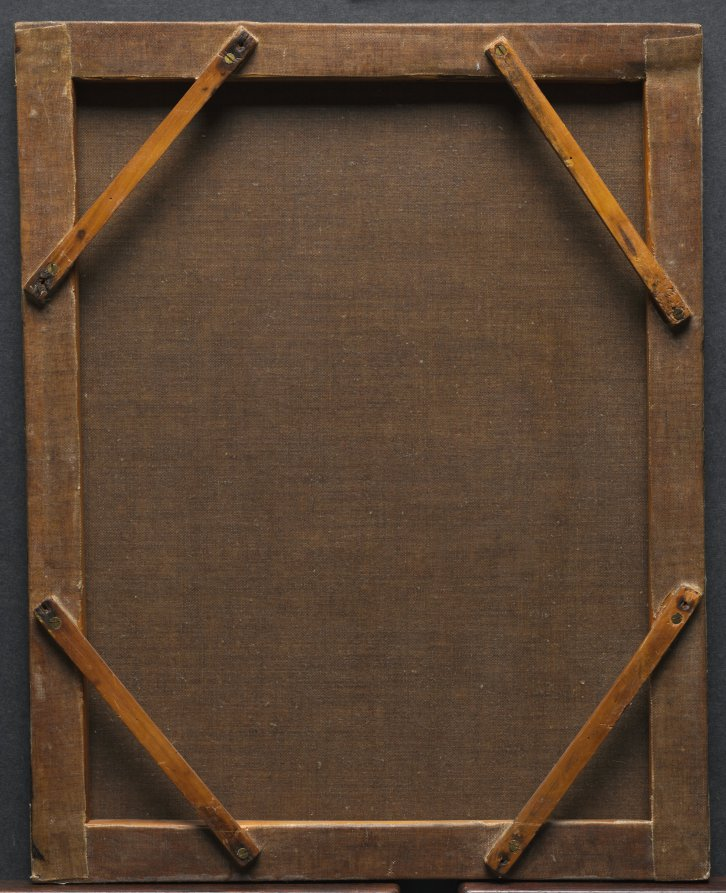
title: Marguerite-Juliette Pierret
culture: France, 19th century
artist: Eugène Delacroix (French, 1798–1863)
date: c. 1827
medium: oil on fabric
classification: Painting